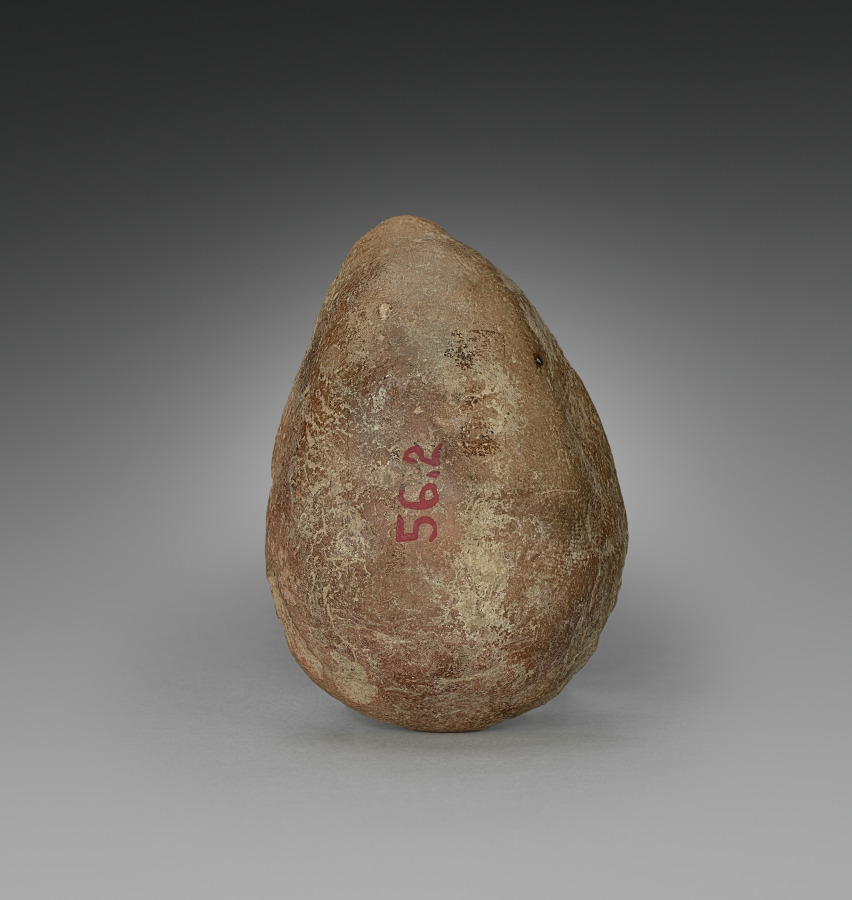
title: Mould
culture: India, Kashmir, 8th-9th Century (?)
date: 700s-800s(?)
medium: terracotta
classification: Ceramic